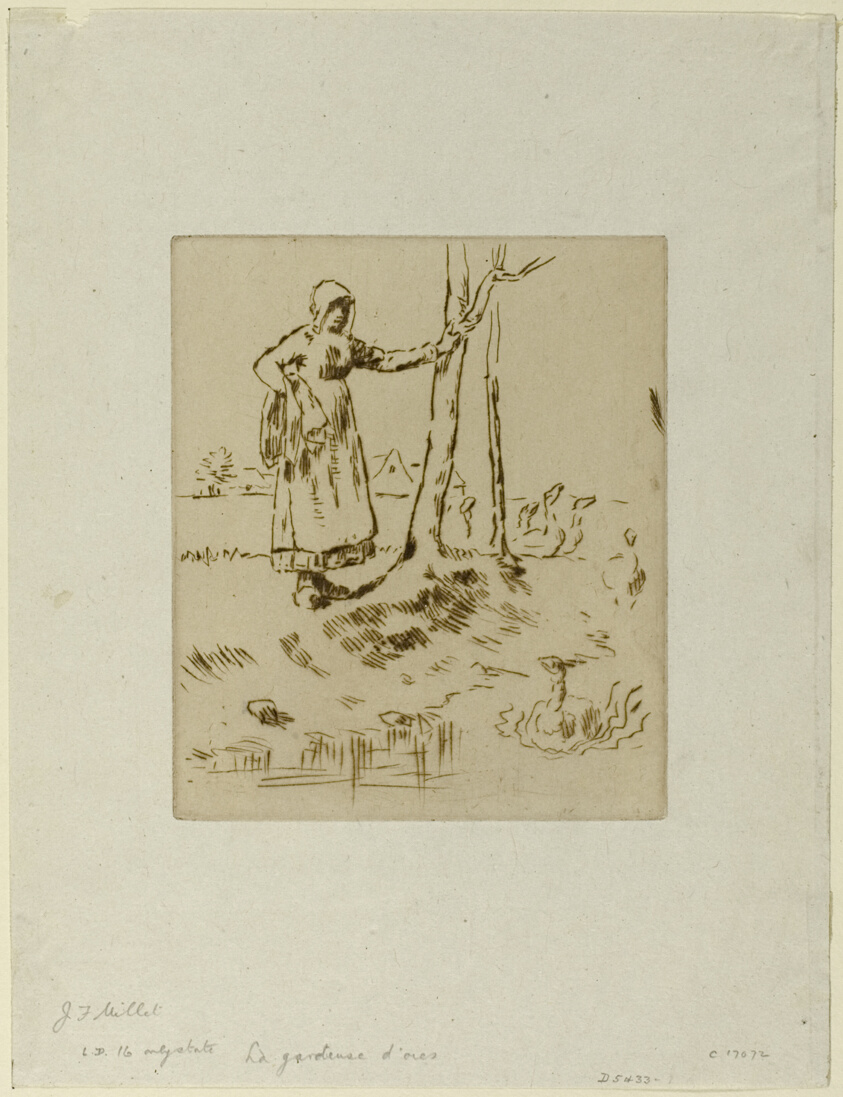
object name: Print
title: A Girl Minding Geese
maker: Jean François Millet (French, 1814-1875)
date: 1855–56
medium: Drypoint in brown ink on ivory wove China paper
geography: France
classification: drypoint; print; prints and drawing